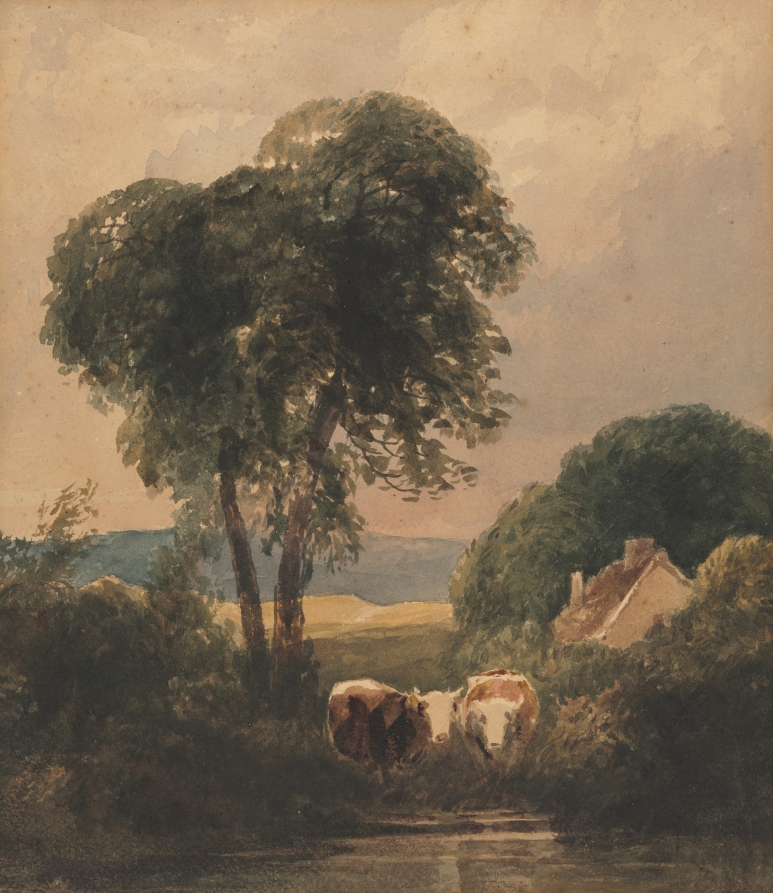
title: Welsh Landscape with Cattle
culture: England, 19th century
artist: Peter De Wint (British, 1784–1849)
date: c. 1807–49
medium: watercolor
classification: Drawing